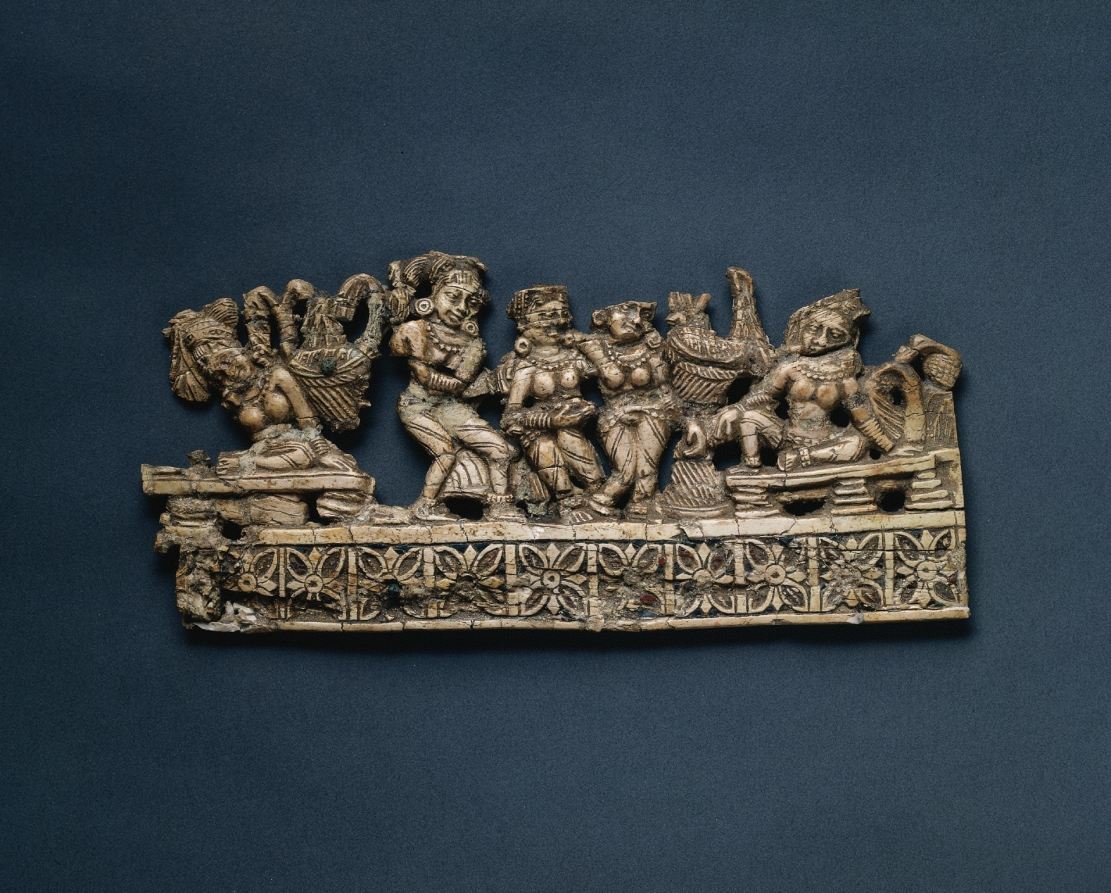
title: Ladies Entertained by Dancers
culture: Afghanistan, Begram, Kushan period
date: 1–200 CE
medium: ivory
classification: Ivory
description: This ivory carving was made to sheath wooden furniture made in India for trade along the Silk Road, which stretched from Rome to China. Indian ivory-faced furnishings--along with lacquer boxes from China and painted glass from Rome--were found in an extraordinary deposit of luxury goods at a site called Begram. The wood on which the ivory and lacquer were affixed has long disintegrated, and only the small pieces remain.